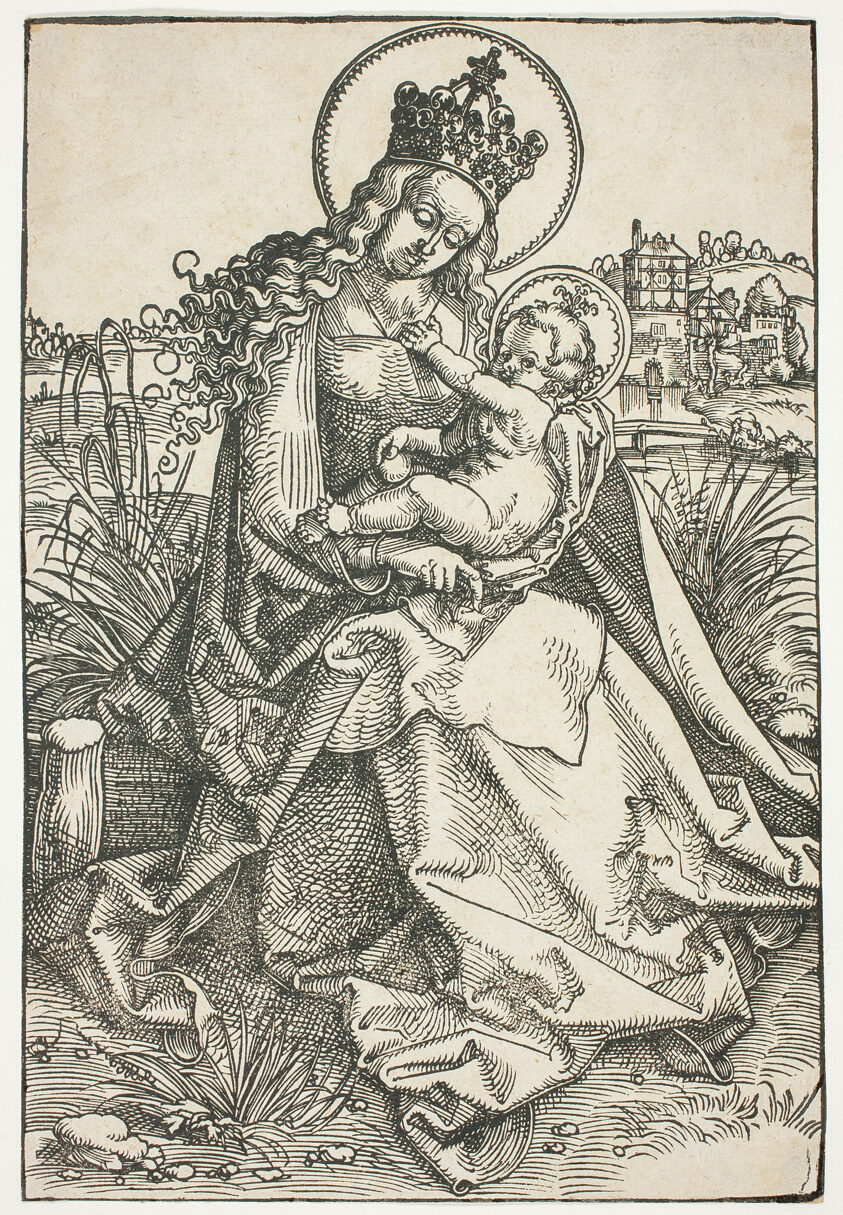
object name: Print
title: Madonna and Child on a Grassy Bench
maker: Hans Baldung Grien (German, 1484/85-1545)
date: 1505–07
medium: Woodcut in black on cream laid paper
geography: Germany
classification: woodcut; print; prints and drawing